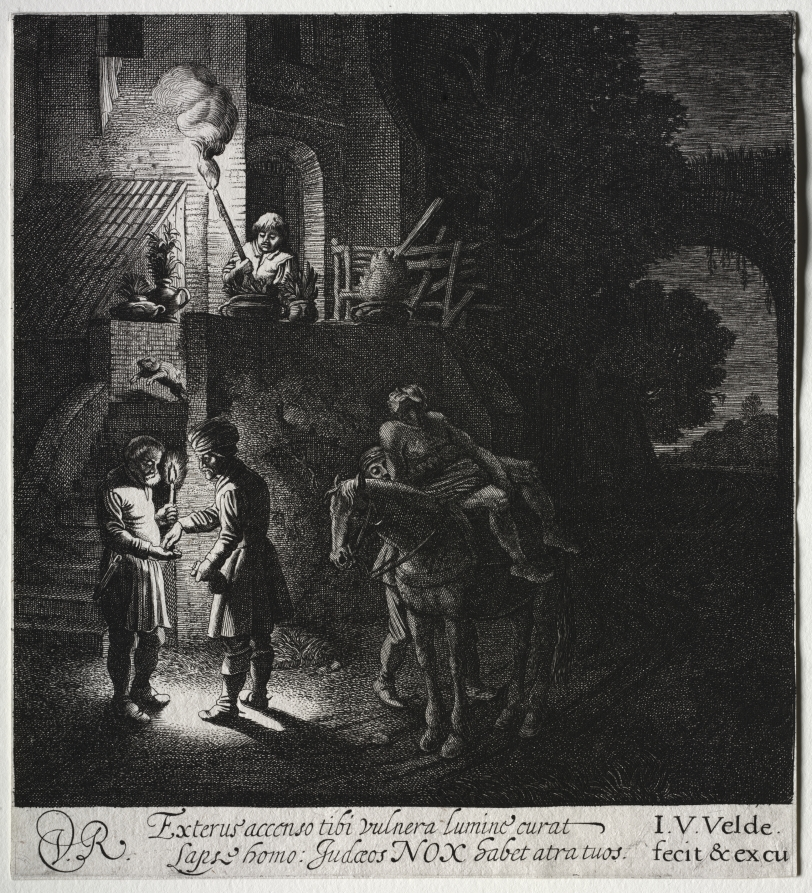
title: The Good Samaritan Paying the Innkeeper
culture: Netherlands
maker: Jan van de Velde II (Dutch, 1593–1641)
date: 1615–41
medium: engraving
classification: Print